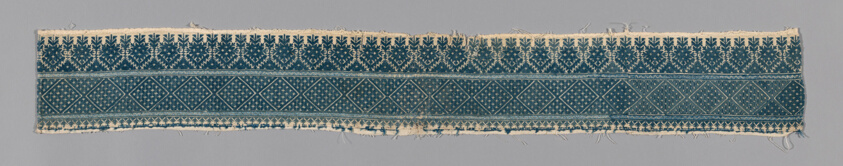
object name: Textile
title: Border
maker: Russia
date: 19th century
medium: Cotton, plain weave; embroidered with silk floss in back, Bosnian, chained border, double running, hem, satin, and single faggot stitches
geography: Russia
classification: textile; needlework (visual works)